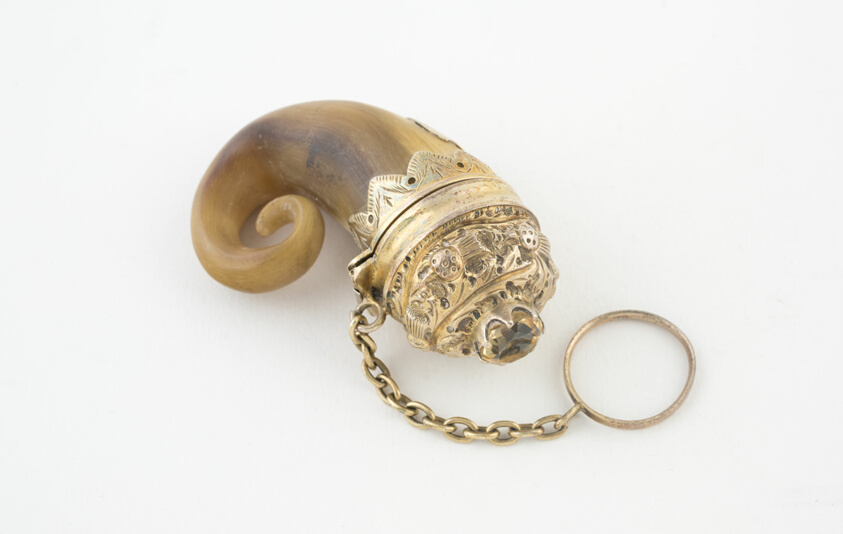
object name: Metalwork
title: Vinaigrette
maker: Possibly Scotland or Netherlands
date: c. 1825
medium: Silver gilt, horn, and cairngorm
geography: Scotland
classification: vinaigrette (container for health care); container for personal use; box; european decorative arts; metalwork; silver; decorative object/ornament